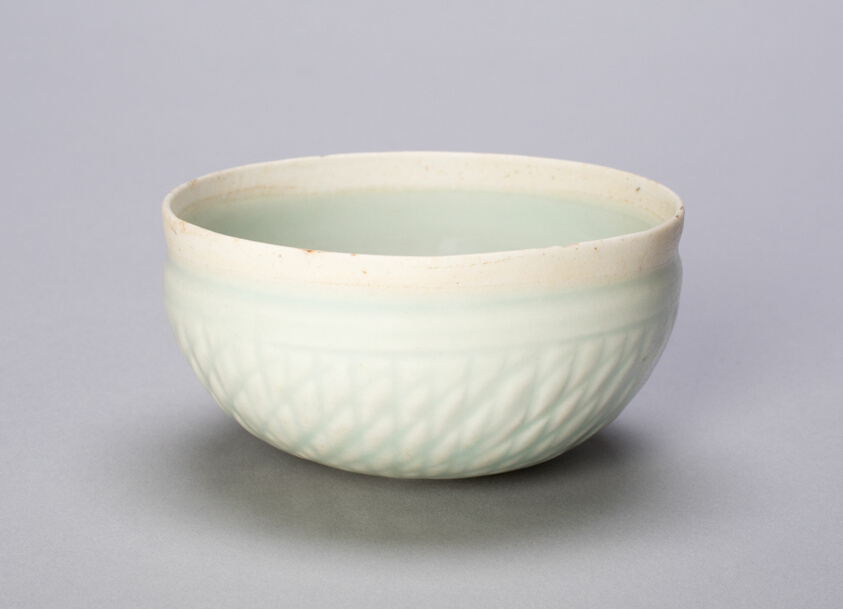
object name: Vessel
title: “Basketweave” Bowl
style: Chinese (culture or style)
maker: China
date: Northern Song dynasty (960–1127), 11th/12th century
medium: Qingbai ware; porcelain with underglaze carved decoration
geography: China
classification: bowl; dish (vessel); ceramics; vessel